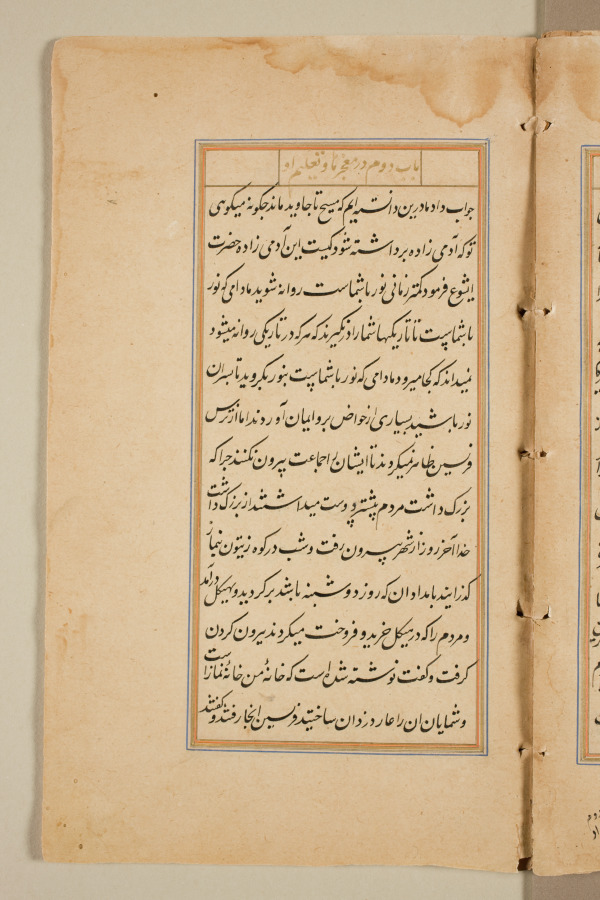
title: Text page from a Mirror of Holiness (Mir’at al-quds) of Father Jerome Xavier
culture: Mughal India, Allahabad, made for Prince Salim (1569–1627)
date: 1602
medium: Ink and gold on paper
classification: Manuscript